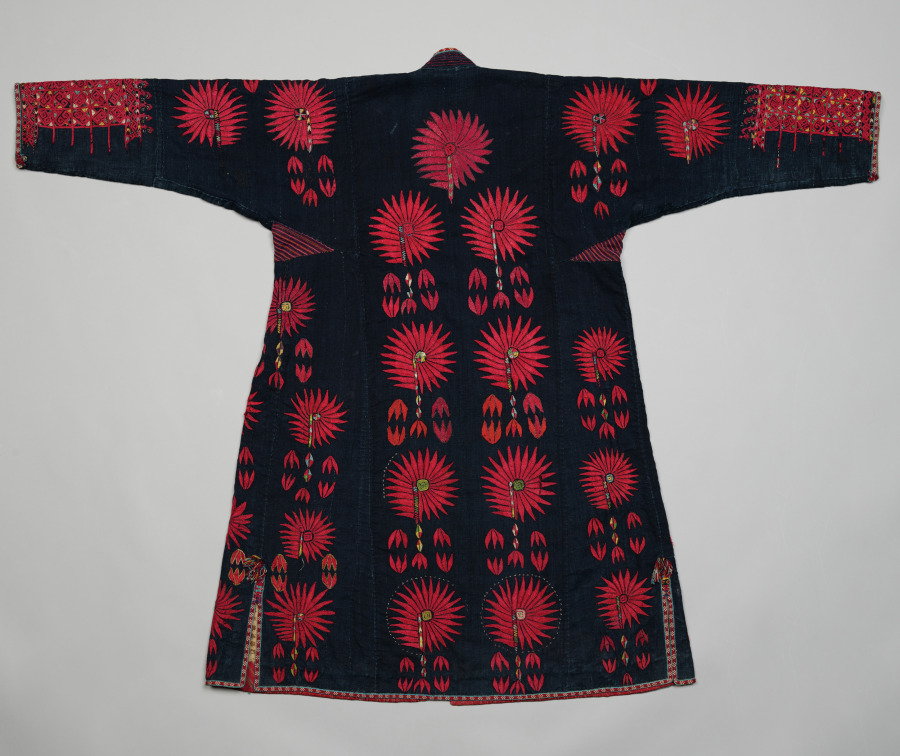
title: Woman's robe with crimson flora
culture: Uzbekistan, Karakapak Republic, Khorezm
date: late 1800s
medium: Plain weave: cotton (hand-spun, indigo dyed), embroidery: silk, cotton; tablet-woven (edges)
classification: Garment